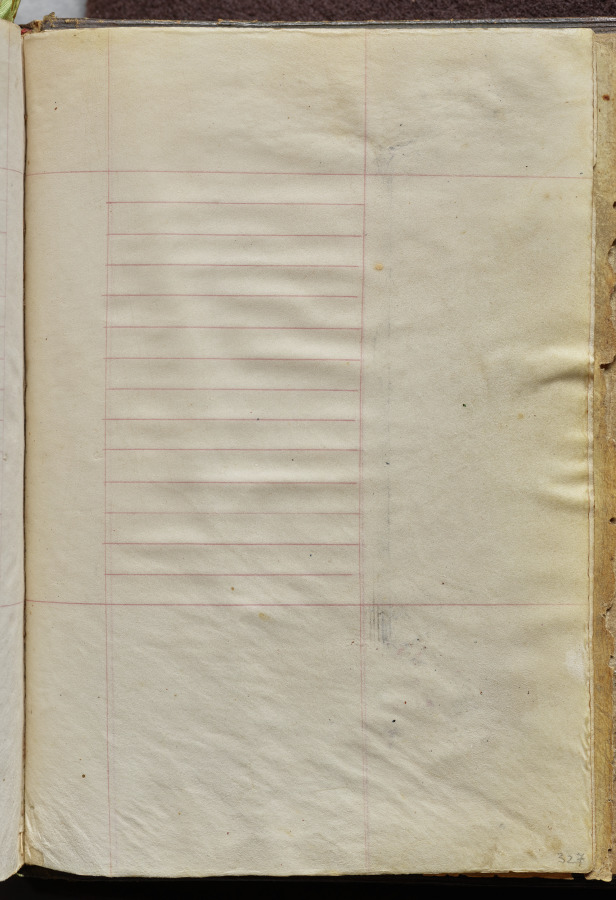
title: Hours of Charles the Noble, King of Navarre (1361-1425), fol. 327r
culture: France, Paris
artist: Master of the Brussels Initials and Associates (French)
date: c. 1405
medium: ink, tempera, and gold on vellum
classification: Bound Volume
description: This precious volume was obviously highly prized by its owner, the French-born King of Navarre, who had his coat of arms painted on no less than twenty folios. Rather than directly commissioning this manuscript from a specific workshop, it seems that Charles the Noble acquired his book of hours -- perhaps ready-made for the luxury market -- while on a trip to Paris in 1404-05. A collaborative effort, six painting styles are evidenced within the pages of this codex, those of two Italians, two Frenchmen, and two Netherlanders. The painter who was responsible for the planning and decoration of the book, and who produced seventeen of the large miniatures, was a Bolognese artist known as the Master of the Brussels Initials. His principal assistant, responsible for most of the borders, was a Florentine who signed his name "Zecho" da Firenze on folio 208 verso.